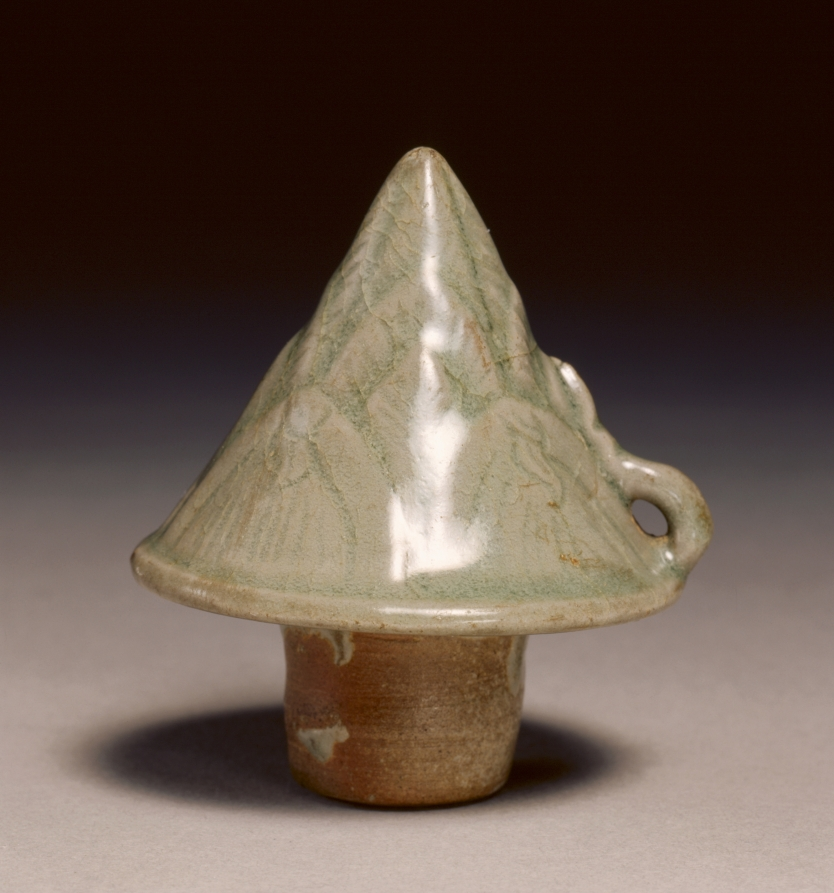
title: Lid for Bamboo Shoot-shaped Ewer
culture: Korea, Goryeo dynasty (918–1392)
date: 1100s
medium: earthenware with carved designs and celadon glaze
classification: Ceramic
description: Natural motifs inspired both the shape of celadon vessels as well as their inlaid designs in the Goryeo period. This wine ewer is shaped like a bamboo shoot, but it also resembles a lotus bud. Even though the spout was repaired, the ewer is a celadon masterpiece of the Goryeo period.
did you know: This lid was donated in 1998 for the bamboo-shaped wine pitcher (CMA 1928.179), but it turned out to be too big.